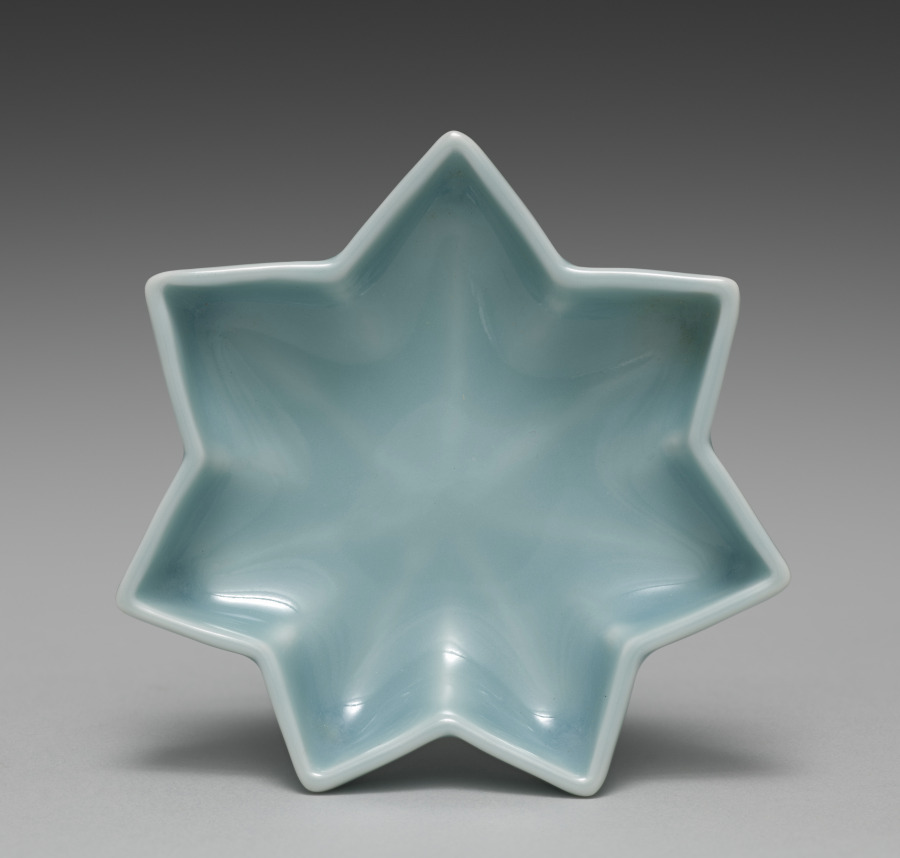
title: Saucer from Maple Leaf-Shaped Saucers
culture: Japan, Meiji period (1868–1912)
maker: Seifū Yohei III (Japanese, 1851–1914)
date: 1893–1914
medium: One of five dishes from a set of ten; porcelain with blue glaze and molded design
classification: Ceramic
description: These maple leaf–shaped saucers, like Yohei III's five shell saucers CMA 2022.188, have a long, horizontal box with a separate compartment for each piece. Now a set of five, these dishes were originally a set of ten, stored in two boxes of five each. From their housings, which accommodate differing numbers of objects, one can hypothesize that while some items created by the Seifu studio were intended to be acquired in larger sets, and thus were perhaps made to order, others, like these, may have been items to be purchased of the shelf in set quantities that allowed clients flexibility in scale. The box for these five saucers describes them as “heavenly blue[–glazed] porcelain” (tenseiji). The veins of the leaves are slightly raised in the clay so that the glaze pools around them and they stand out as white where the glaze thins. There are longer lines at the points of the leaves and shorter ones following the wall of each indentation so that the design has both a horizontal and a subtle vertical dimension.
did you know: These saucers shaped like maple leaves show Seifū Yohei III’s “heavenly blue glaze.”